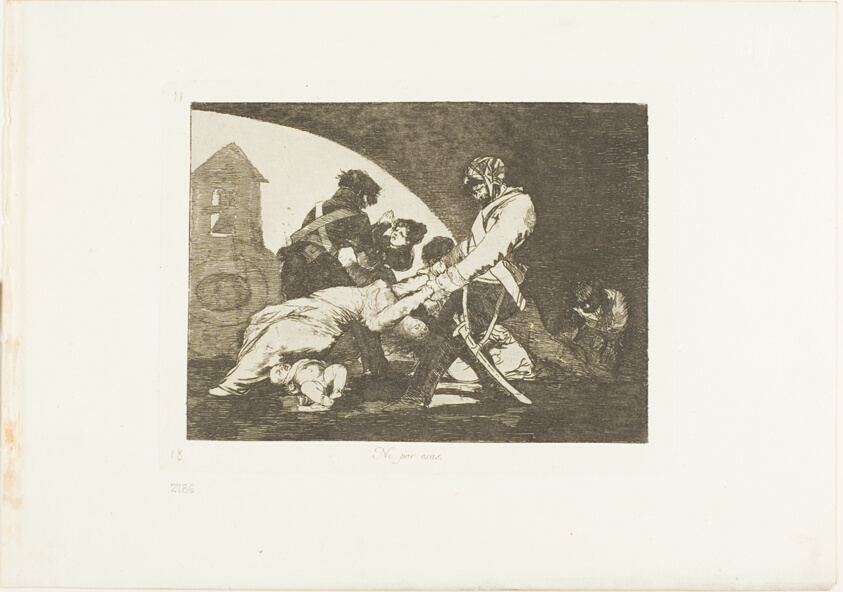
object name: Print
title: Nor do these, plate eleven from The Disasters of War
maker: Francisco José de Goya y Lucientes; Spanish, 1746-1828; publisher: Real Academia de Nobles Artes de San Fernando; Spanish, 1744-1873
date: 1810/15, published 1863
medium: Etching, lavis, drypoint and burin on ivory wove paper with gilt edges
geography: Spain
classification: etching; print; prints and drawing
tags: war